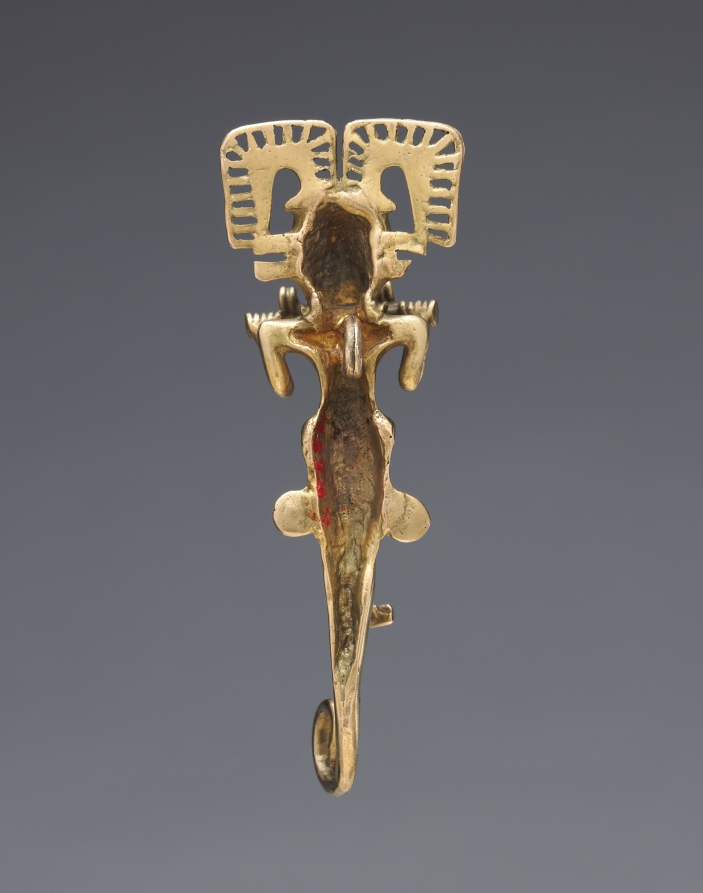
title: Pendant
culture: Panama, International Style, 5th-7th century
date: 400–700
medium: cast gold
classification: Metalwork